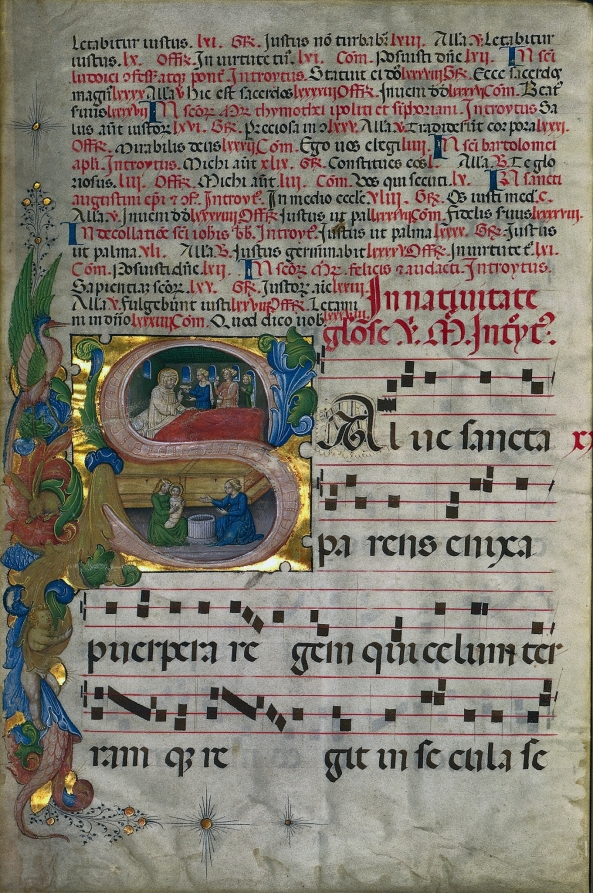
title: Leaf from a Gradual: Historiated Initial S[alve Sancta Parens] with Birth of the Virgin (recto) and Music (verso)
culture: Northern Italy, 15th century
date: c. 1420–50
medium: ink, tempera, and gold on vellum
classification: Manuscript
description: This beautiful leaf is dominated by a large historiated S from which sprays of foliage inhabited by a putto, a rabbit, and a stork extend into the left margin. A scene representing the birth of the Virgin is within the double curve of the S. Saint Anne, the Virgin’s mother, occupies the birthing bed in the upper scene. Below, the infant Mary has been bathed and wrapped in swaddling clothes. In manuscript missals and their musical counterparts, the gradual, votive masses are generally assigned one to each day of the week with Saturday reserved for the Blessed Virgin. The votive Mass to the Virgin varied from season to season. Three masses were, therefore, supplied—one for advent, one to be used from Christmas to purification, and a third, represented by this leaf, to be used from purification to advent. This text reads: Salve sancta parens (“Hail Holy Parent”) introducing the opening of the introit for the Saturday votive Mass for the Nativity of the Virgin (September 8) in the liturgical calendar. The identity of the artist remains elusive, as does his precise place of origin. The figure style and ornament suggest a source in North Italy, perhaps in an artistic center such as Pavia, Mantua, or Padua.